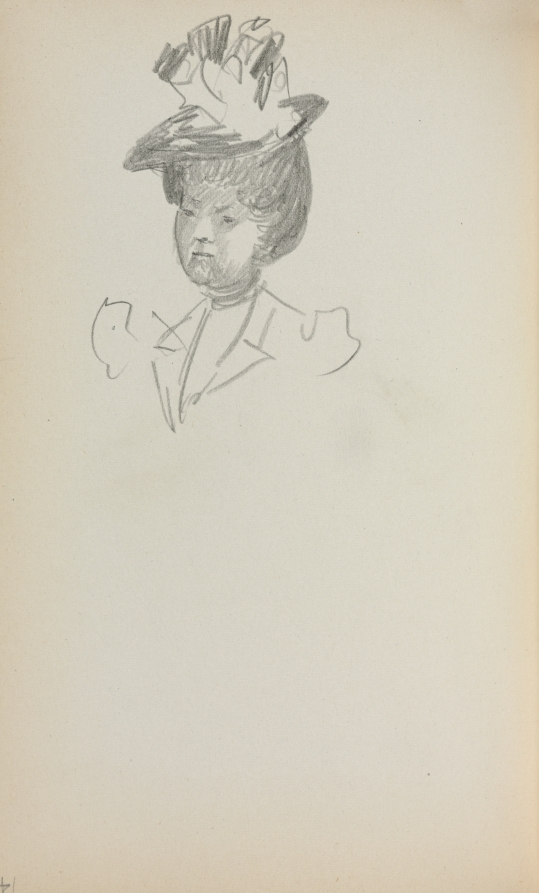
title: Italian Sketchbook: Woman, Bust Length (page 142)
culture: America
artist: Maurice Prendergast (American, born Newfoundland [now Canada], 1858–1924)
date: 1898–1899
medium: pencil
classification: Bound Volume